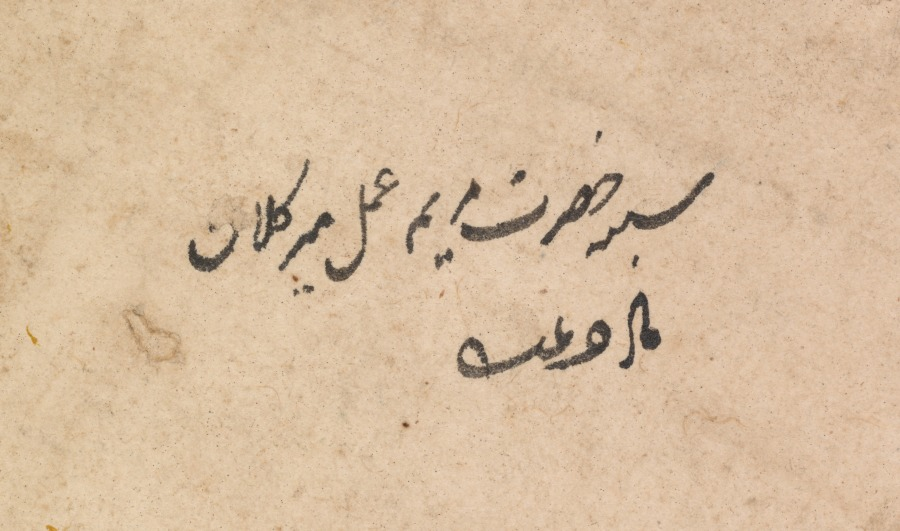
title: Jesus among the doctors in the Temple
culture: India, Lucknow, Mughal, 18th century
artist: Mir Kalan Khan (Indian, c. 1730–1775)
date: c. 1760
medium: Gum tempera and gold on paper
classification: Painting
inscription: Persian inscription on verso: an image of Blessed Miriam, work of Mir Kalan Khan